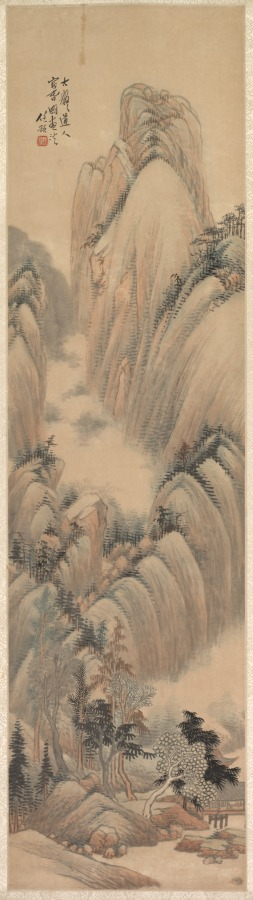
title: Landscape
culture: China, Qing dynasty (1644-1911)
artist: Ren Yu (Chinese, 1853–1901)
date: 1892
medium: Hanging scroll; color on paper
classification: Painting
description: This seasonal landscape is from a set of four hanging scrolls by Ren Yu. He was the youngest, most eccentric, and least prolific of the Four Rens, a family of prominent painters in Shanghai during the late Qing dynasty (1644–1911). Perhaps due to his opium habit and subsequent financial difficulties, Ren Yu tended to be lackadaisical in his work. The few remaining high-quality paintings hint at his artistic potential lost to opium. Though Ren’s premature death left his artistic promise unfulfilled, his paintings were acquired and donated to the museum by Charles Lang Freer (1854–1919), a wealthy businessman and art collector from Detroit. As Freer had hoped, this donation of Ren Yu paintings inspired the young Cleveland Museum of Art to continue to expand its own Chinese painting collection.